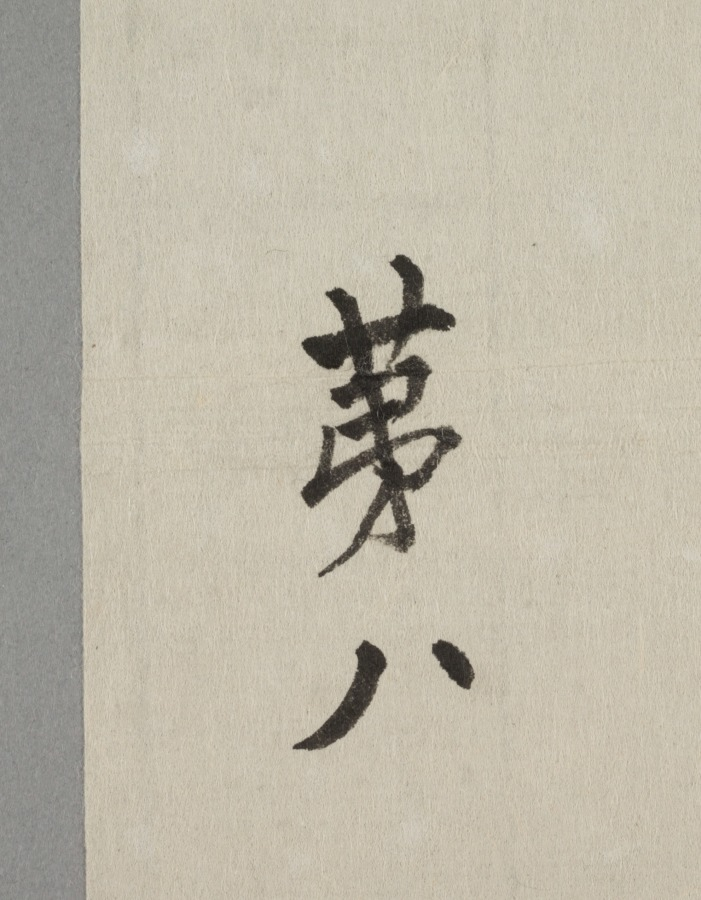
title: Tiger in Wind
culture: Japan, Edo period (1615–1868) to Meiji period (1868–1912)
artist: after Maruyama Ōkyo (Japanese, 1733–1795)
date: 1800s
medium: hanging scroll; ink on paper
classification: Painting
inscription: 「秋空一鶴」賛 長嘯一聲風括地「月渚」朱文方印「祐常之章」白文方印 壬辰初冬寫応挙 「應舉之印」白文方印・「仲選」白文方印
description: The seals appended to the inscription on this painting suggest that the text was brushed by Yūjō (1723–1773), an imperial prince who became a Buddhist monk and was abbot of Enman'in at Miidera. The line is from a poem attributed to a Yuan dynasty poet, Yu Ruyu (dates unknown), and describes the sound of a fierce wind lashing the ground. Wind is associated with the roar of the tiger. Yūjō was Maruyama Ōkyo's most important patron as a young artist, and this painting has a signature asserting that Ōkyo created it in 1772, the year before Yūjō's death. While Yūjō produced a preface for a now famous set of handscrolls he commissioned Ōkyo to paint, and a number of Ōkyo's compositions for Enman'in survive, this work would appear to be one imagining their relationship, as opposed to a genuine piece.